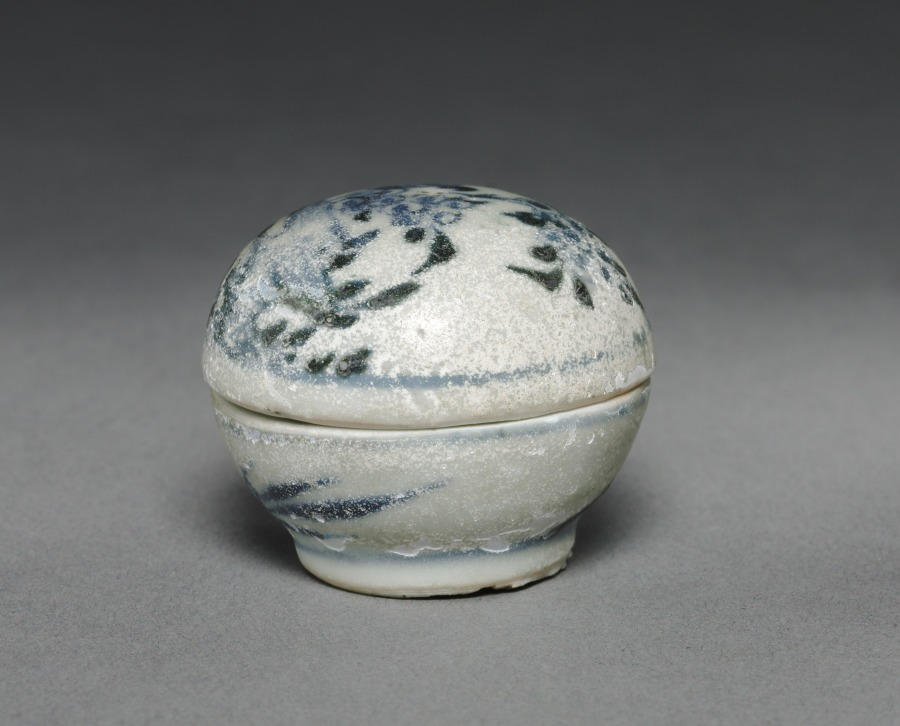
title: Pill Box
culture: China, Qing dynasty (1644-1911)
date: c. 1752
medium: porcelain with blue and white decoration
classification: Ceramic